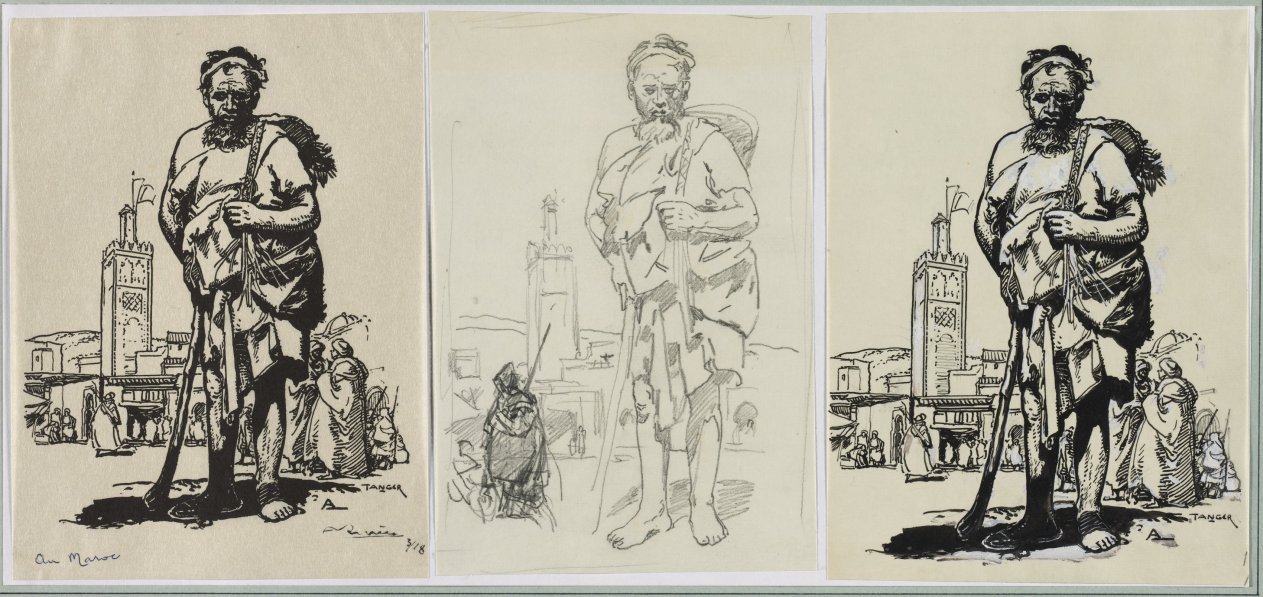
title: Au Maroc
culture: France, 20th century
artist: Auguste Louis Lepère (French, 1849–1918)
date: 1914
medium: brush and black ink over pencil with white highlights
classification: Drawing